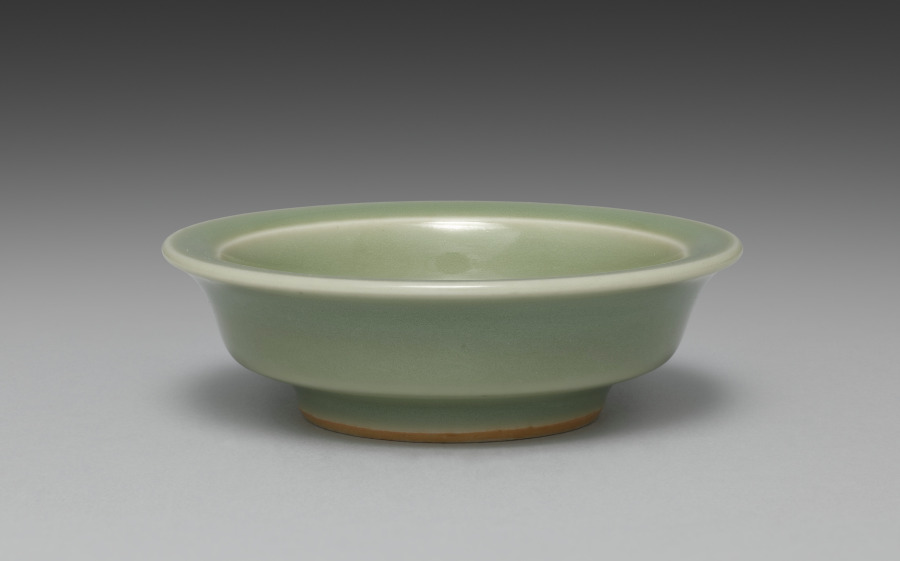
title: Saucer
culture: Japan, Meiji period (1868–1912)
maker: Seifū Yohei III (Japanese, 1851–1914)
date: 1893–1914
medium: One from a set of ten dishes; porcelain with green glaze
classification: Ceramic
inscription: 清風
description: Yohei III’s main output for his sophisticated clientele was in the form of tea sets and dining sets. He created a range of dishes in green glazes. He often produced in pairs, sets of five, or sets of ten. For this set of ten small dishes in a simple, round form that emphasizes the glaze above all, the box lid designates the piece as seiji, or green-glazed porcelain, using a general term for the extensive palette of green glazes often called celadon in English. The box lid further identifies the dishes themselves as tōchō, literally “bean-sized saucers,” a size that makes them suitable for dipping sauces.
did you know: The ten dishes in this set are stored in stacks of five in a two-compartment box.